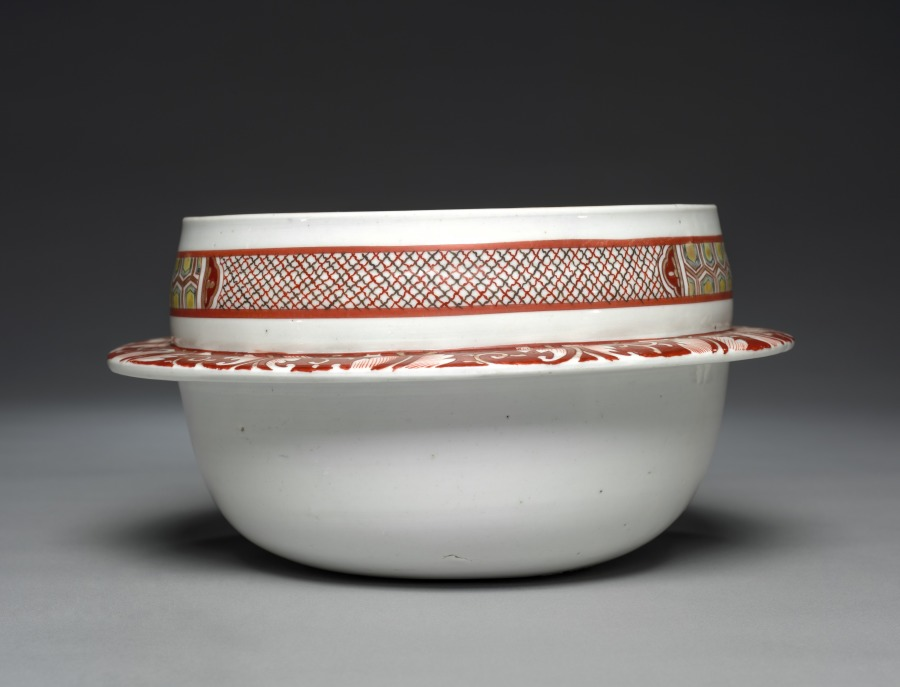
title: Rice Container: Ko Imari Type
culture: Japan, Edo period (1615–1868)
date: late 1600s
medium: porcelain with overglaze enamel and gold decoration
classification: Ceramic